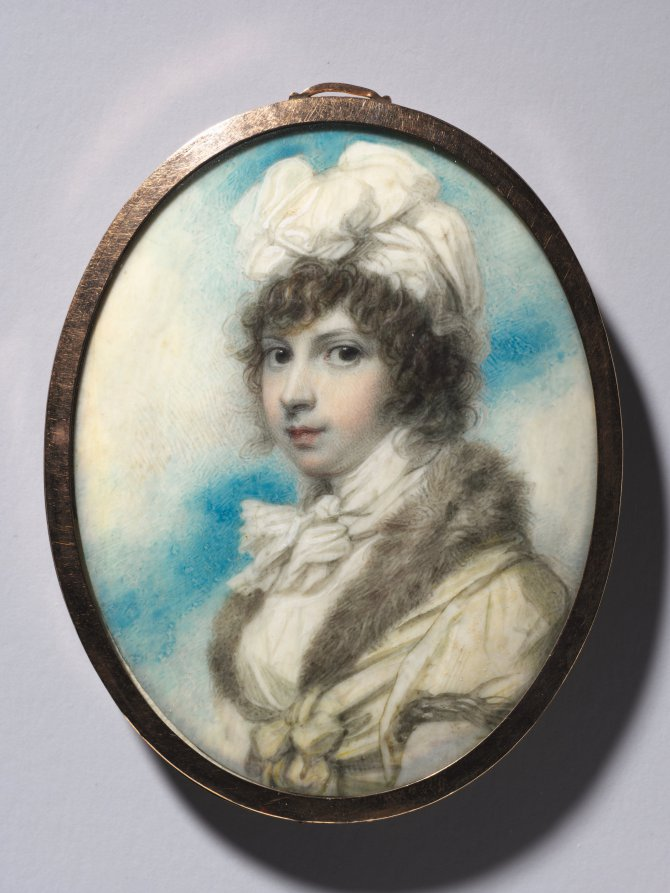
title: Portrait of the Hon. Anne Annesley, later Countess of Mountnorris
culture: England, 19th century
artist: Richard Cosway (British, 1742–1821)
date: c. 1800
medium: watercolor on ivory in a gold frame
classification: Portrait Miniature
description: Anne Annesley (née Courtenay, 1774–1835) was the eighth daughter of William 2nd Viscount Courtenay, and sister of William 3rd Viscount Courtenay, who commissioned numerous paintings of himself and his six sisters from Richard Cosway in oil and miniature. William’s expenditure for these works between 1790 and 1812 reached £1,370, a bill that wasn’t paid in full until 1820. Anne married George Annesley, later 2nd Earl of Mountnorris, in September 1790. Cosway, who frequently depicted female sitters in gauzy white gowns, lavished attention on Anne’s attire. Her pale yellow coat is lined with fur that is sensitively delineated with a combination of short brushstrokes distinct from those that form her dark, wavy hair. Fur-trimmed jackets like this one would probably have been worn indoors by women during the colder months.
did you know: Another version of this portrait is nearly identical to the Cleveland miniature and was likely for another friend or member of Anne's family.